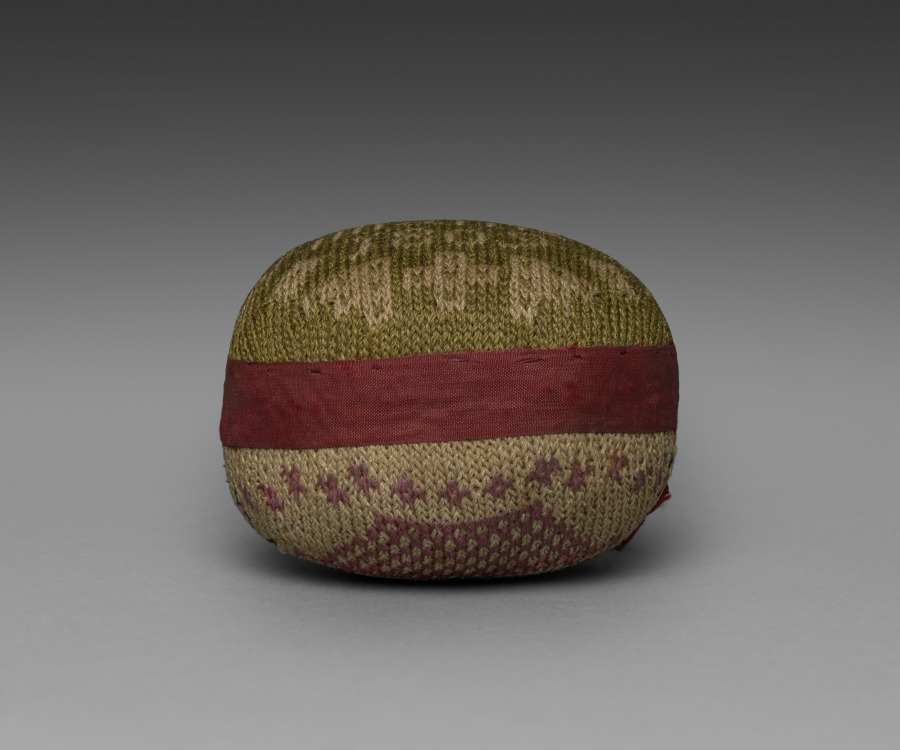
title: Pin Cushion Sampler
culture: England, 19th century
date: 1809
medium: Silk, knitted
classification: Sampler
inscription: "MARY WILLIAMSON 1809."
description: There is an inscription knit into this pin cushion, with the name Mary Williamson and the date 1809.